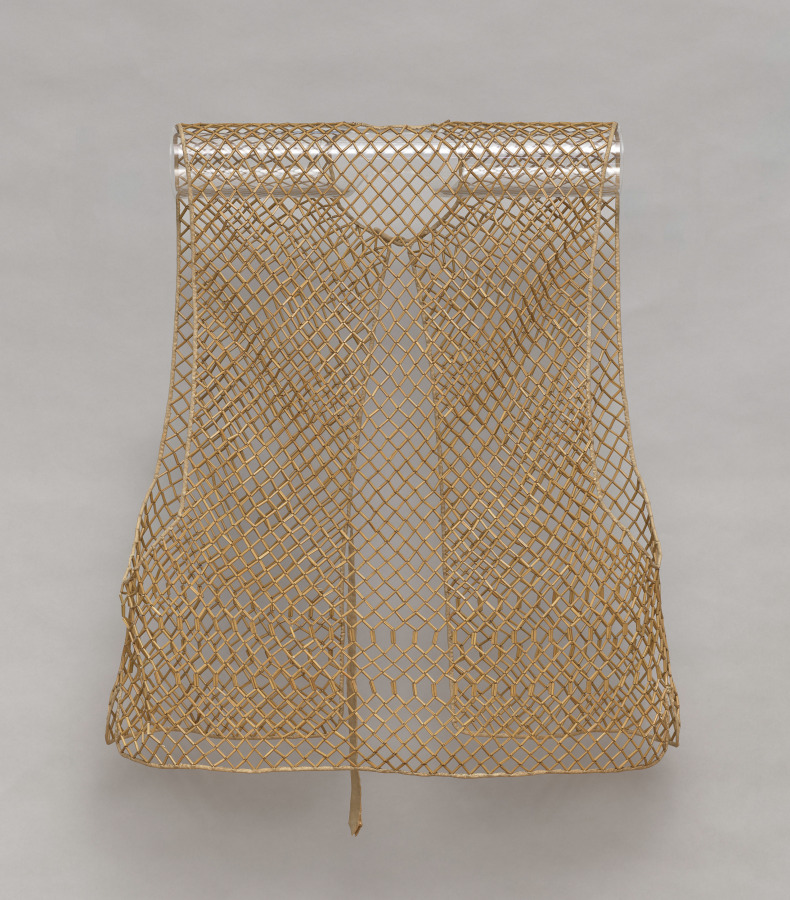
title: Sleeveless garment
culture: China, Qing dynasty (1644-1911)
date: 1800s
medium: Bamboo beads strung together in diamond and hexagon patterns; edges in plain weave cotton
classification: Garment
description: This loose-fitting bamboo vest is a summer undershirt, made of an estimated 3,490 fine bamboo tubes. The overall structure of the vest is held together with cotton thread. Such vests were worn under an outer garment to allow the air to circulate and protect the outer garment from soilage, especially in the hot and humid climate of southern China. Textual evidence indicates that officials during the 1500s in Jiangnan wore bamboo vests from Jiangsu province, one of the production centers.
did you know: According to Nhat Quyen Nguyen, CMA graduate intern in textile conservation, this garment is made of at least 3,490 cut bamboo pieces.